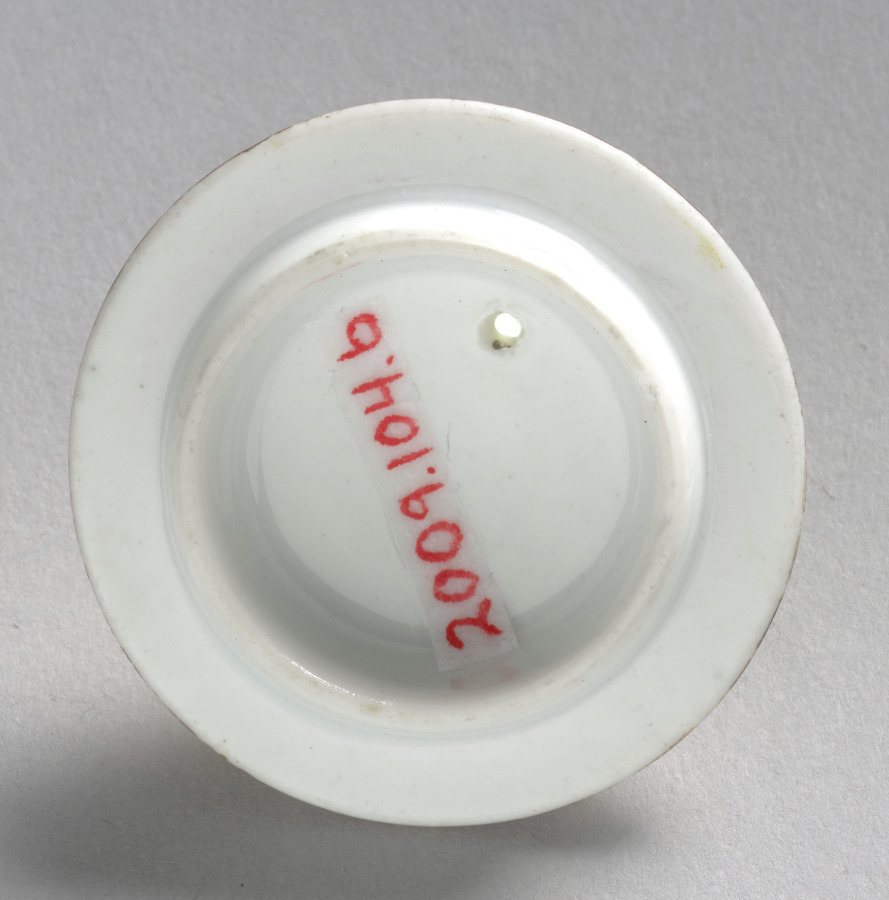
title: Lid for a Teapot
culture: Germany, Meissen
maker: Meissen Porcelain Factory (German, est. c. 1710)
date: c. 1750–70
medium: porcelain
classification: Ceramic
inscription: Mark on the bottom that looks like two swords crossing, with a small V intersecting.